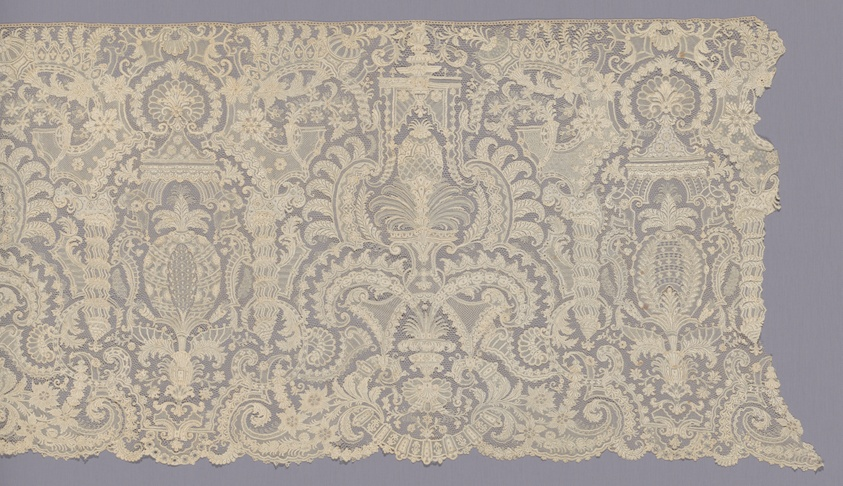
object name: Costume and Accessories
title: Flounce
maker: France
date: 1701/25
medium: Linen, needle lace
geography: France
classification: textile; lace - needle; costume component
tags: fashion, arabesque, cartouches, columns, pineapples